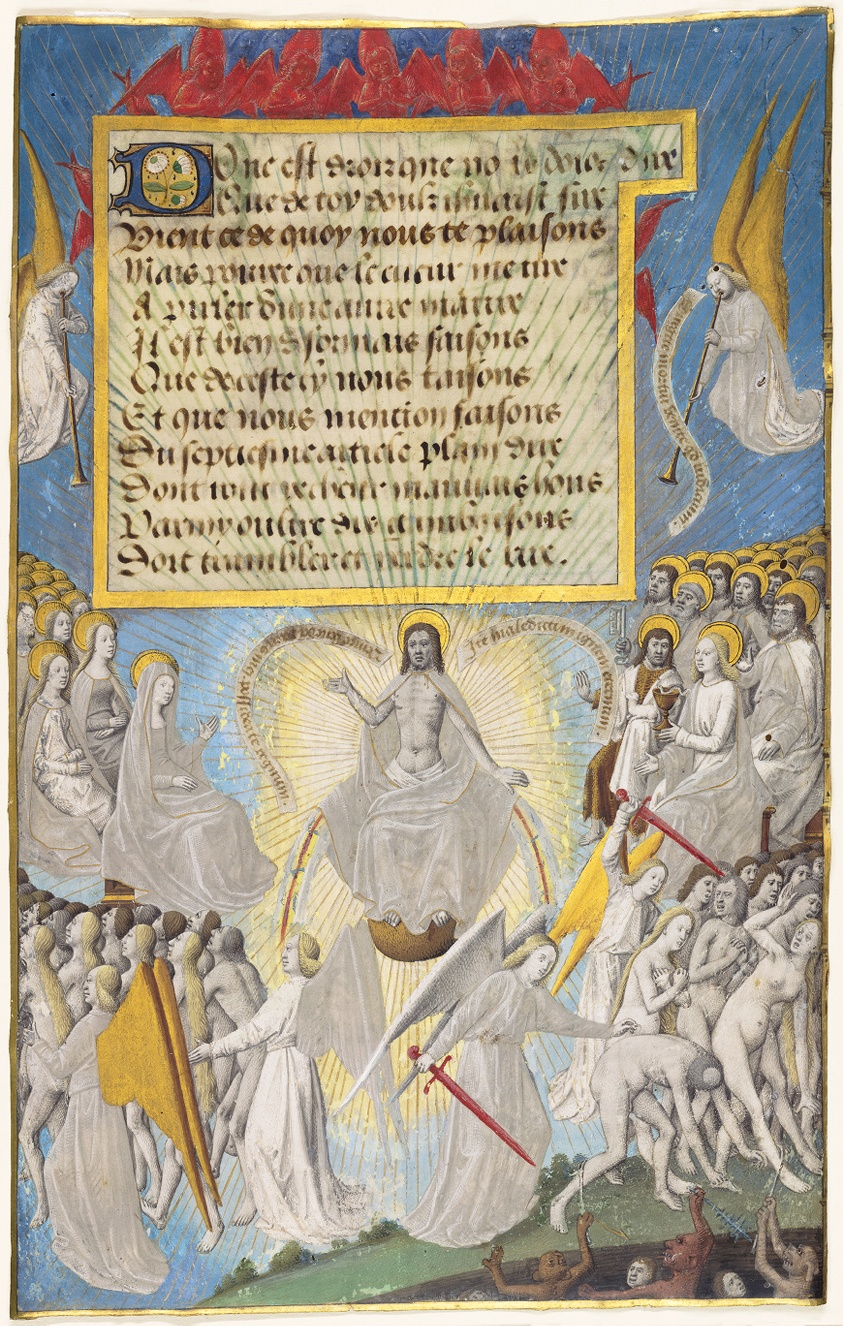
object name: Drawing and Watercolor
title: The Last Judgment from Les Sept Articles de la Foi by Jean Chappuis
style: medieval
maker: Maître François; French, active 1450-1499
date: c. 1470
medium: Manuscript cutting in tempera and gold leaf, and letter bâtarde inscriptions in brownish-black ink, unruled, with decorated initial, on parchment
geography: France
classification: tempera; manuscript; drawings (visual works); prints and drawing